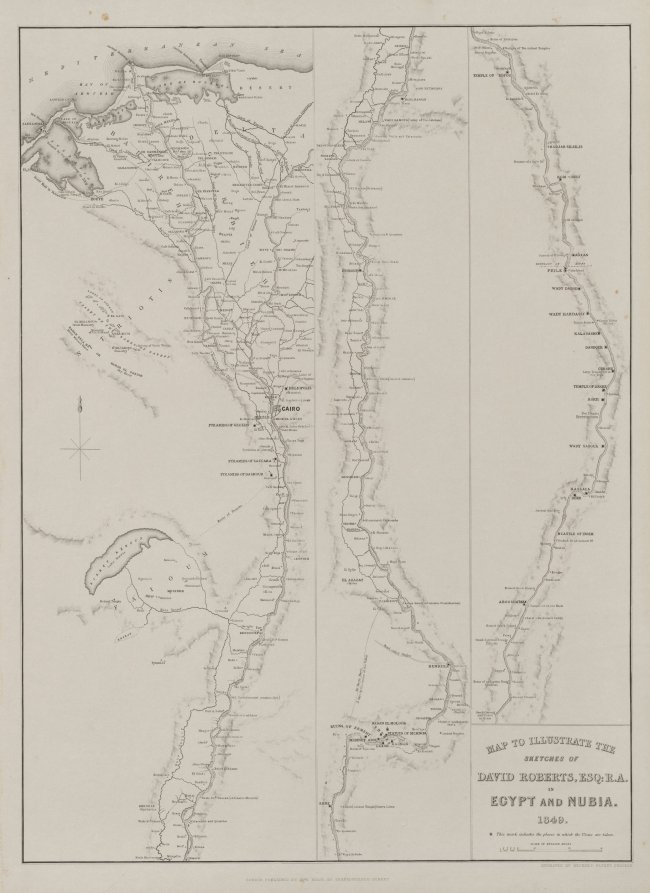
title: Egypt and Nubia, Volume III: Map to Illustrate the Sketches of David Roberts, Esq: R.A. in Egypt and Nubia 1849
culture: England, 19th century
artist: Louis Haghe (British, 1806–1885)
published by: F. G. Moon, 20 Threadneedle Street, London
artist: after David Roberts (Scottish, 1796–1864)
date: 1849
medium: engraving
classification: Print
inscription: Inscribed on plate, lower right: Engraved by Becker's Patent Process